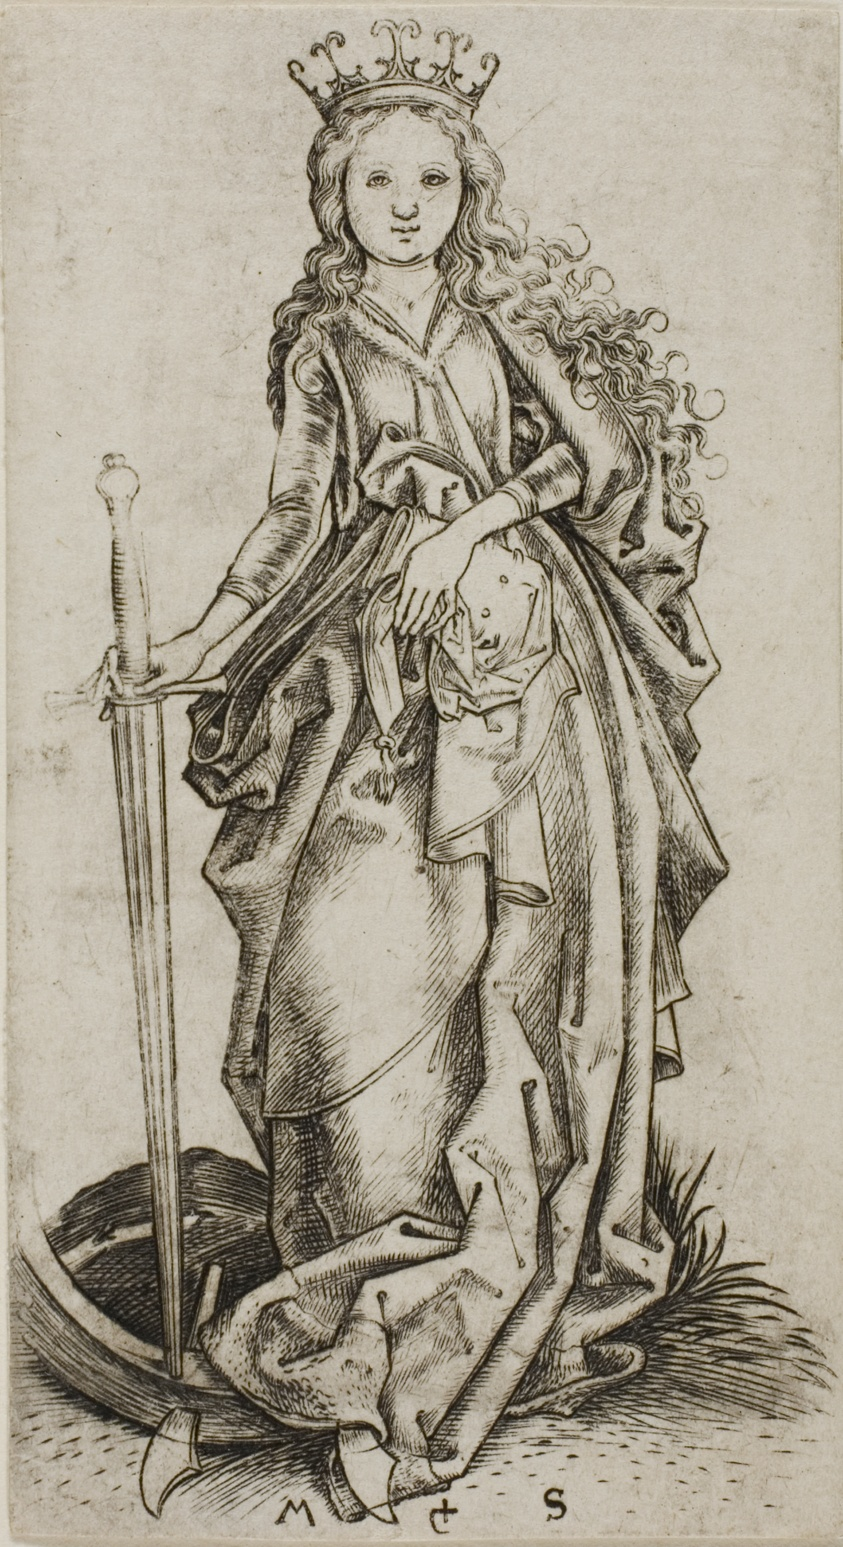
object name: Print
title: The Small Saint Catherine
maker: Martin Schongauer (German, c. 1430/50-1491)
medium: Engraving on paper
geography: Germany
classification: engraving; print; prints and drawing